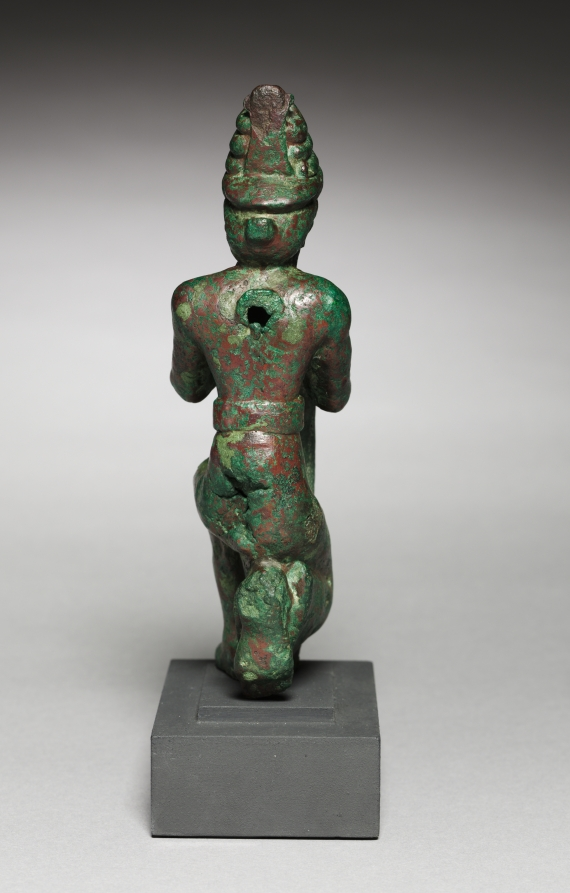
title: "Foundation Nail" of Gudea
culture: Mesopotamia, Neo-Sumerian, Iraq, probably Lagash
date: c. 2100 BCE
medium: copper alloy, lost-wax cast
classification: Sculpture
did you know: The ruler Gudea placed one of these special nails in every temple he built in order to commemorate it.